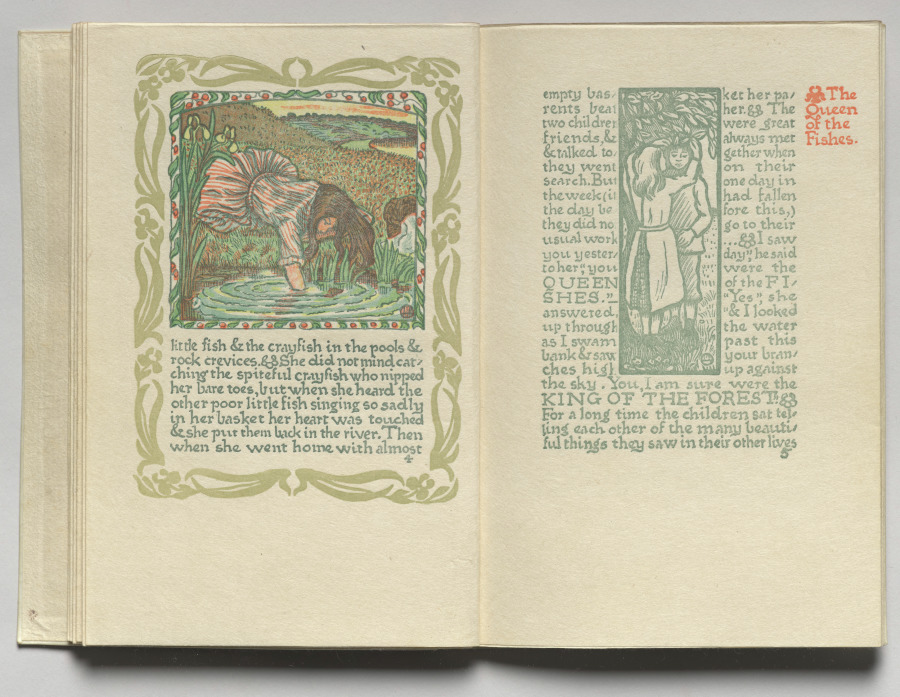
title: The Queen of the Fishes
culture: England, 19th century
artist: Lucien Pissarro (British, 1863–1944)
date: 1894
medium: Bound volume with color wood-engraved illustrations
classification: Bound Volume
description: “The Queen of the Fishes” is a French fairy tale about two mistreated children who turn into a fish and an oak tree. This edition was the first book published by the Eragny Press, the private firm of Lucien Pissarro, son of impressionist painter Camille Pissarro. Following the example of William Morris, Lucien wanted to return to the careful design and high-quality materials of early printed books. He and his wife, Esther Bensusan Pissarro, made this publication almost entirely by hand, including designing and engraving all the illustrations and ornaments.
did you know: Lucian Pissarro was a son of Impressionist painter Camille Pissarro.